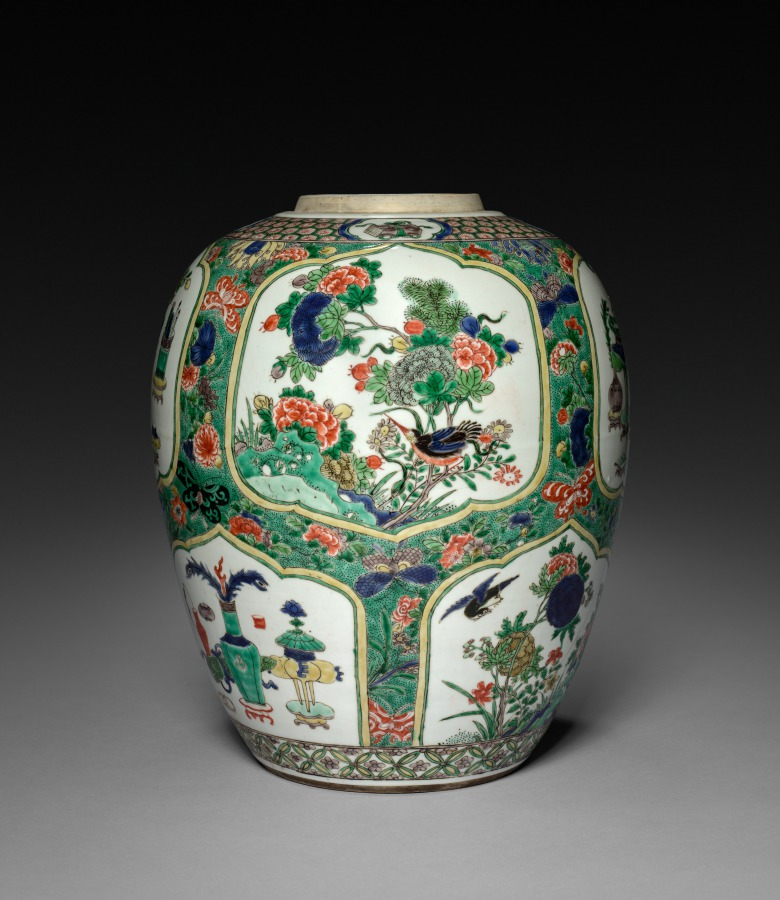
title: Vase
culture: China, Qing dynasty (1644-1911), Kangxi reign (1661-1722)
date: 1622–1722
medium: porcelain with underglaze decoration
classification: Ceramic